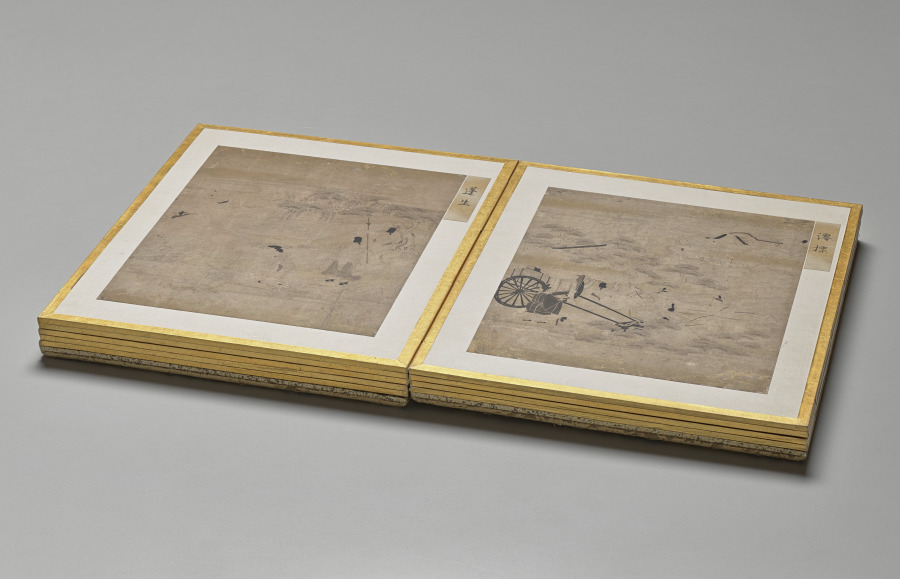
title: Album of Illustrations for the Tale of Genji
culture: Japan, Edo period (1615–1868)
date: 1600s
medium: Double-sided accordion-style album of 17 leaves; ink, light color, and gold on paper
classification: Bound Volume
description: This album contains illustrations for the classic literary work the Tale of Genji, authored in the 1000s by Murasaki Shikibu, an aristocrat of the Heian period (794–1185) court. The scenes are painted in the “white drawing” (hakubyō) mode, in which a fine ink line is used to depict figures and spaces with great subtlety, punctuated only occasionally by traces of red pigment for a character’s lips, a detail of a garment, or a decorative element. These two scenes illustrate episodes from the chapters “Thin Veil of Cloud” (Usugumo) and “Barrier Gate” (Sekiya).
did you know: The illustrations are identified by chapter title in cartouches to the upper right of the paintings.